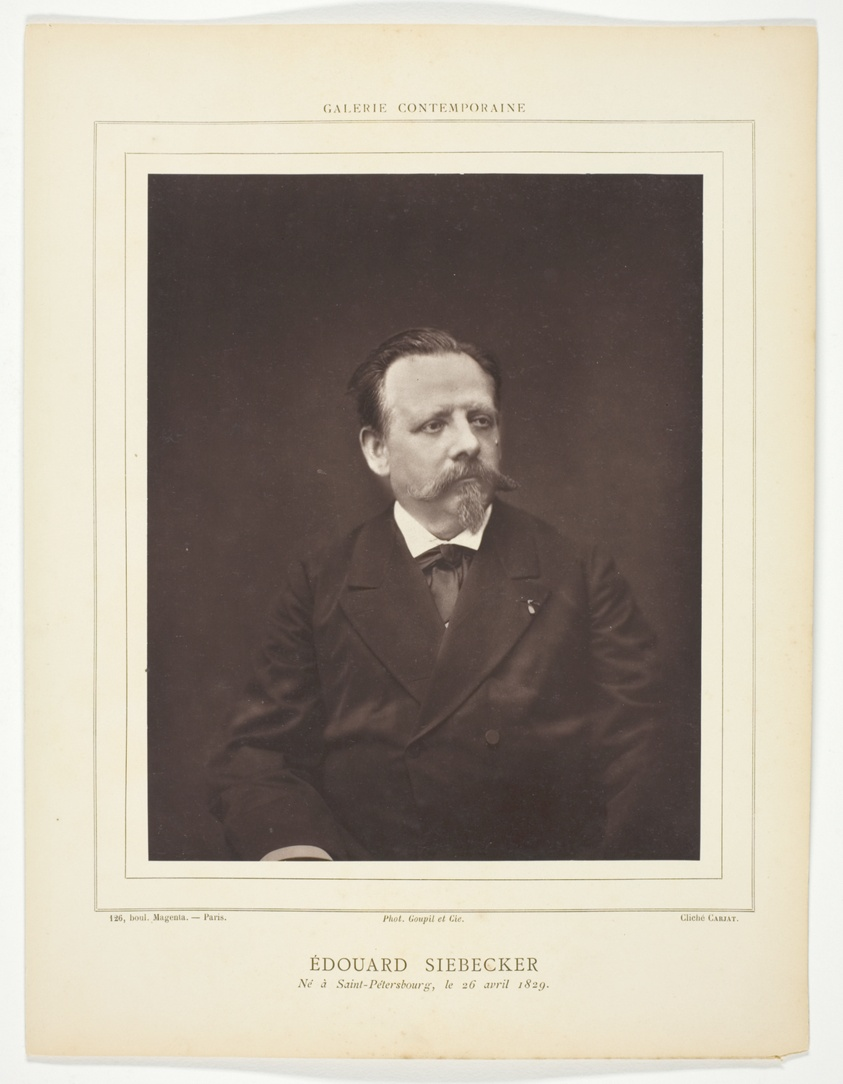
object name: Photograph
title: Édouard Siebecker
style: 19th century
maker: Etienne Carjat (French, 1828–1906)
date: c. 1876/84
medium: Woodburytype, from the periodical “Galerie Contemporaine Littéraire, Artistique”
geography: France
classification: woodburytype; photomechanical process; photography; photograph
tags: Collected by Hugh Edwards, Contemporaine Littéraire